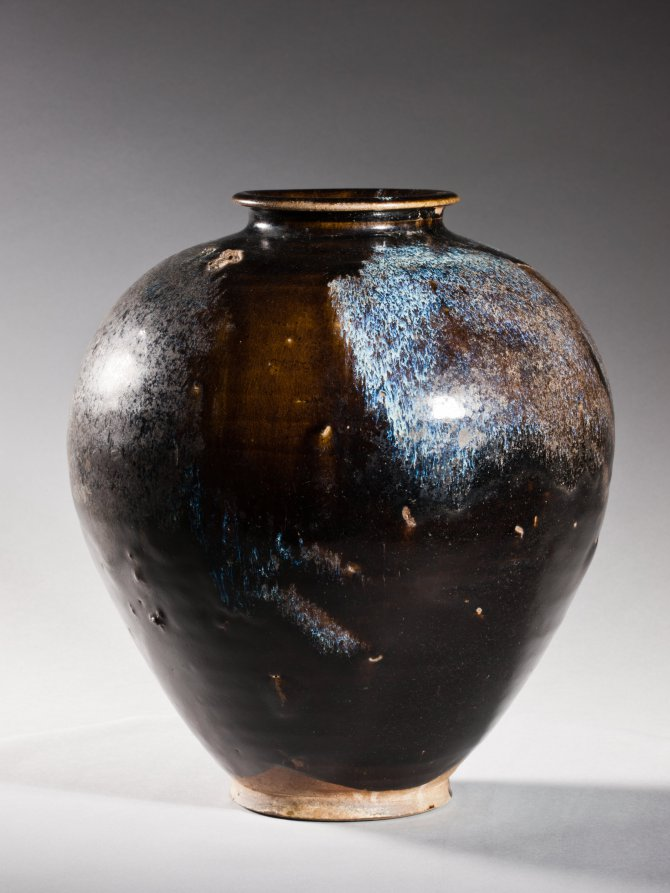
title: Jar: Black Ware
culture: China, Henan province, Huangdao kilns, Tang dynasty (618-907)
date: 700s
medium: glazed stoneware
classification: Ceramic